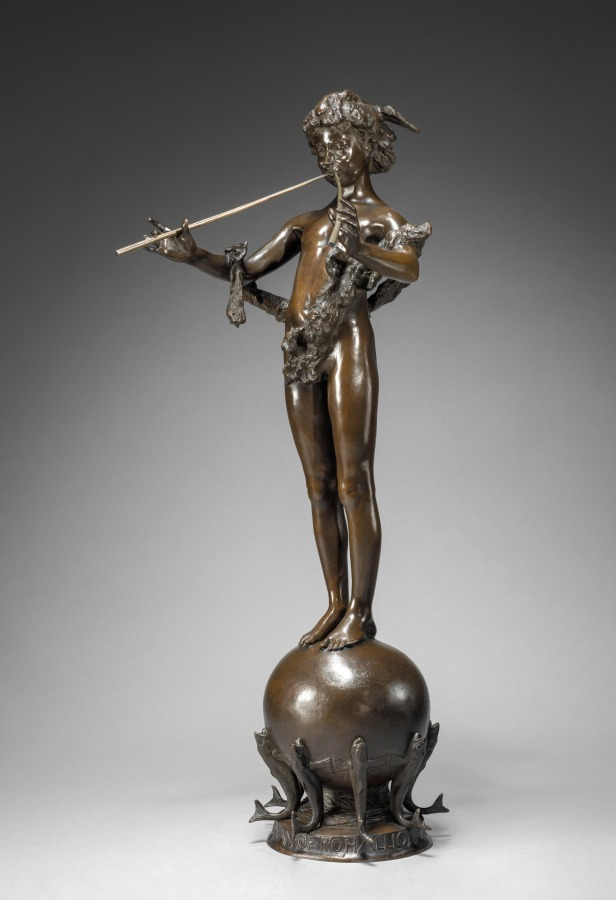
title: Pan of Rohallion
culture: America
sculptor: Frederick William MacMonnies (American, 1863–1937)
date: 1890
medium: bronze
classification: Sculpture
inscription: Signed on globe: Frederick MacMonnies, Paris 1890. © 1894. Inscribed around base: TO PAN OF ROHALLION ANNO DOMINI MDCCCLXL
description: Rohallion in the title refers to the name of an estate in New Jersey, whose owner commissioned MacMonnies to create a large fountain of this design for a garden pool. Later, the artist made several smaller versions, such as this example. Here, the ancient Greek god Pan plays his musical pipes while standing on an orb supported by fish.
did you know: The character of Peter Pan, including his flute playing, references the Greek god Pan.